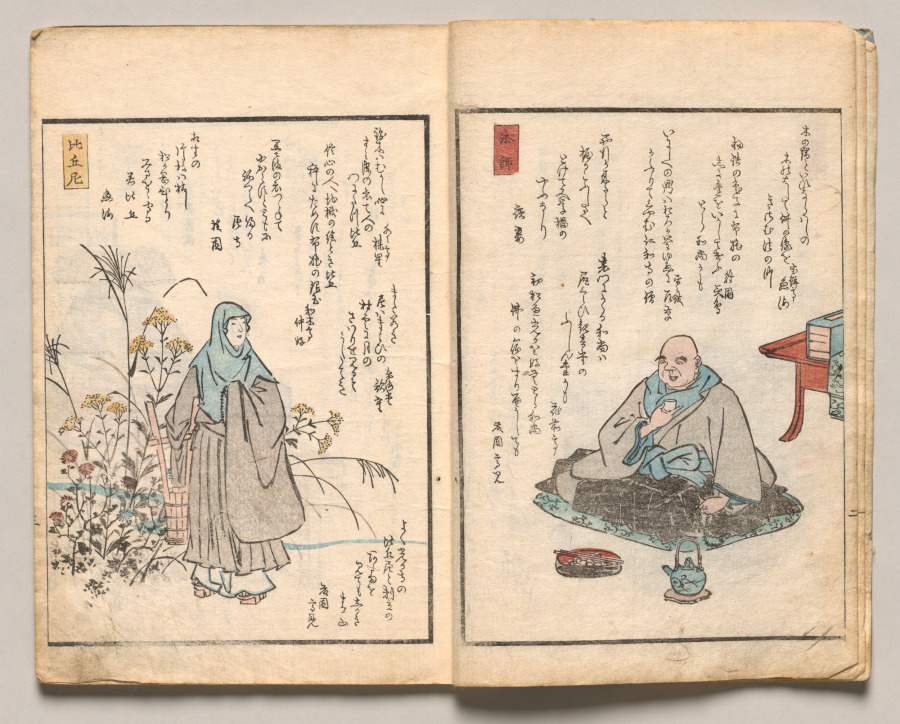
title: Spread Three from Volume Two of People of Japan in Light Verse (Kyōka)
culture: Japan, Edo period (1615–1868)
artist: Utagawa Hiroshige (Japanese, 1797–1858)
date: 1857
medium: Woodblock-printed book; ink and color on paper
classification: Bound Volume